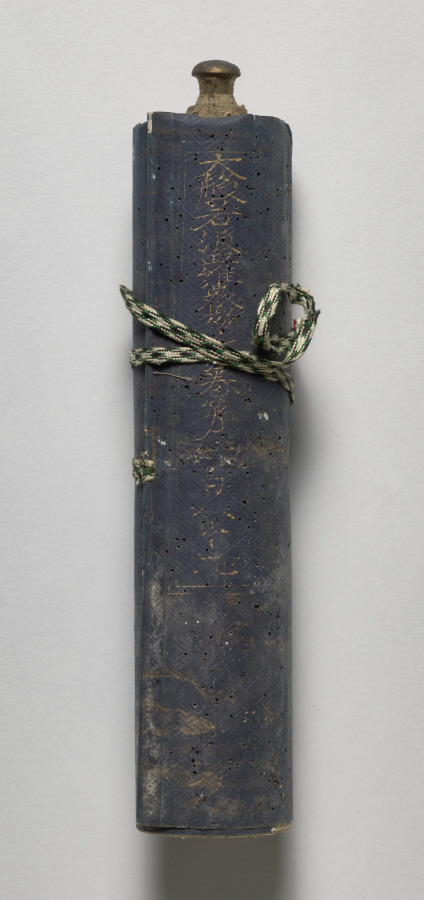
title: Volume from the Great Perfection of Wisdom Sutra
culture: Japan, Heian period (794–1185)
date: late 1100s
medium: Handscroll; ink and gold on dyed paper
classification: Manuscript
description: This scroll is part of the 600-volume Great Perfection of Wisdom Sutra. The sacred text addresses the perfection of wisdom and the nonsubstantiality of all phenomena, or the emptiness of all things. It takes the form of Shakyamuni Buddha’s preaching at four locations. This scroll is from the Perfection of Wisdom in 100,000 Lines, which occupies the first 400 volumes. At one time, religious clergy kept all the scrolls in a lacquered wood repository on view nearby. They are now too fragile to open and we will conserve them over time.